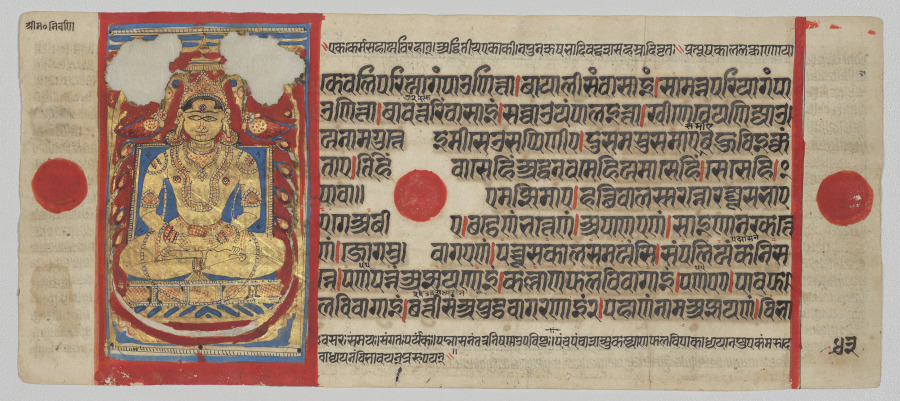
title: Mahavira in the Realm of Liberation (Nirvana), Folio 43 (verso), from a Kalpa-sutra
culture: Western India, Gujarat, last quarter of the 15th century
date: c. 1475–1500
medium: Gum tempera, ink, and gold on paper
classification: Painting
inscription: [[upper left]] Śrī Ma* nirvāṇa